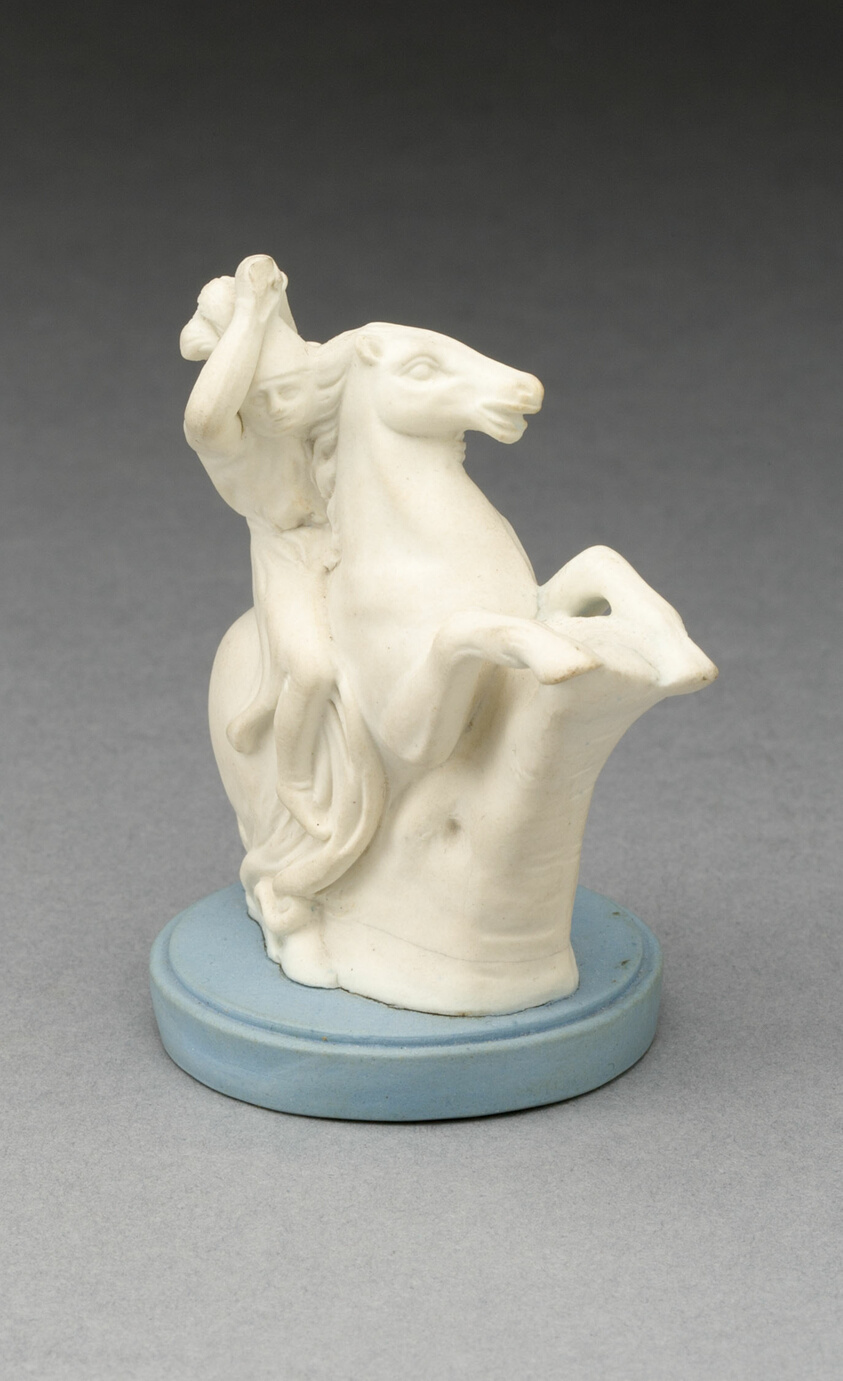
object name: Ceramics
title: Chess Piece: Knight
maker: Wedgwood Manufactory (England, founded 1759)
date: 19th century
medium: Stoneware (jasperware)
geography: Burslem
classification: accessories (object genre); ceramics; stoneware; european decorative arts